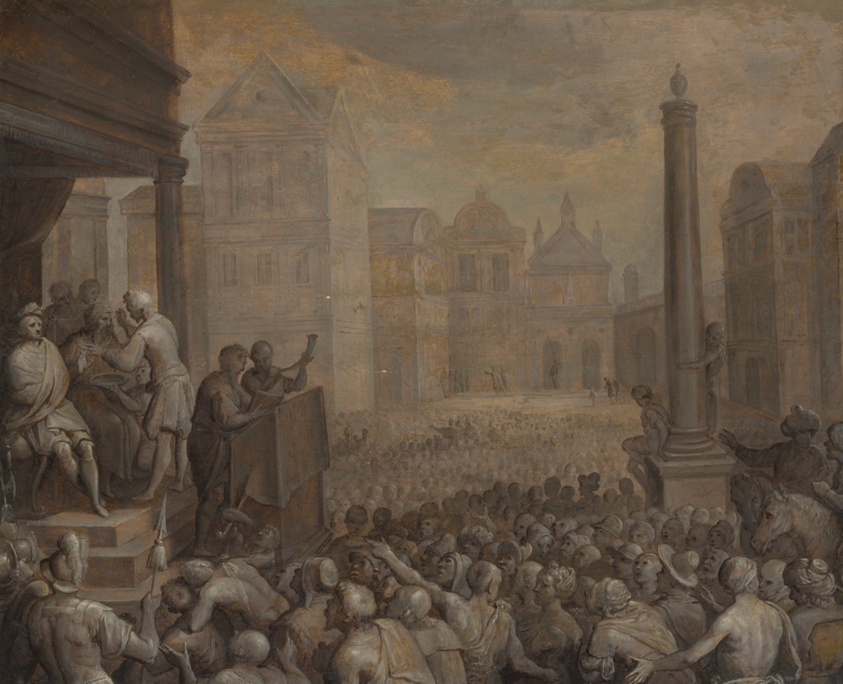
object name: Painting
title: The Judgement of Zaleucus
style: 17th Century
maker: Otto van Veen (Flemish, c. 1556/57–1629)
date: 1605/10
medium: Oil on panel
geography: Netherlands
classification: painting; paint; oil paintings (visual works); oil on panel; flemish; european painting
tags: violence, towns, townscapes, people, men, figure, figures, soldiers, weapons, spears, public